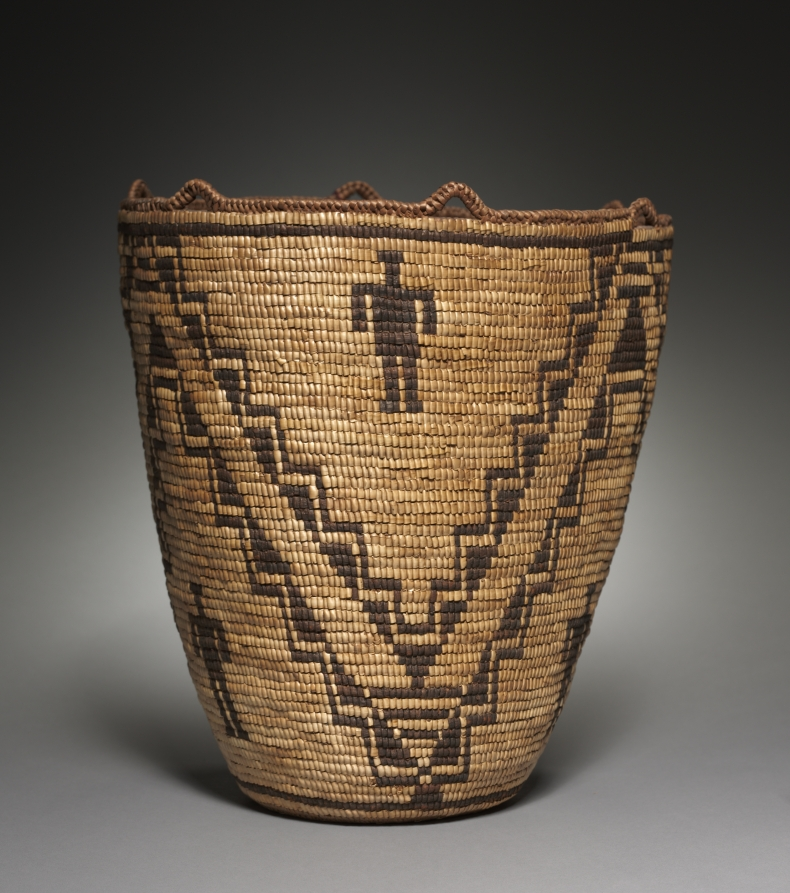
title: Burden Basket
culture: Native North American, Pacific Northwest, Plateau, Klickitat people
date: c.1900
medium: horsetail fragments on cedar rool; coiled, imbricated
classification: Basketry